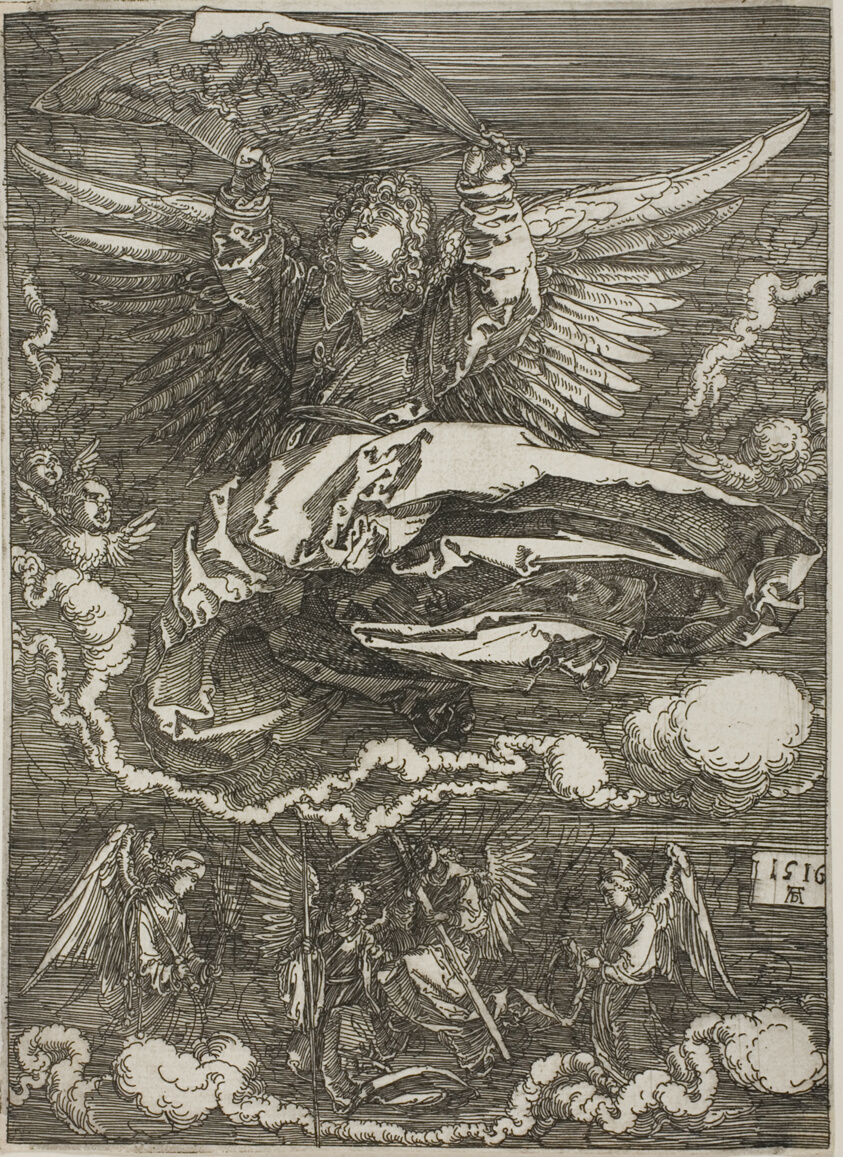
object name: Print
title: Sudarium Spread Out by an Angel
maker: Albrecht Dürer (German, 1471-1528)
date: 1516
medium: Etching in black on ivory laid paper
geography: Germany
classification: etching; print; prints and drawing; paper